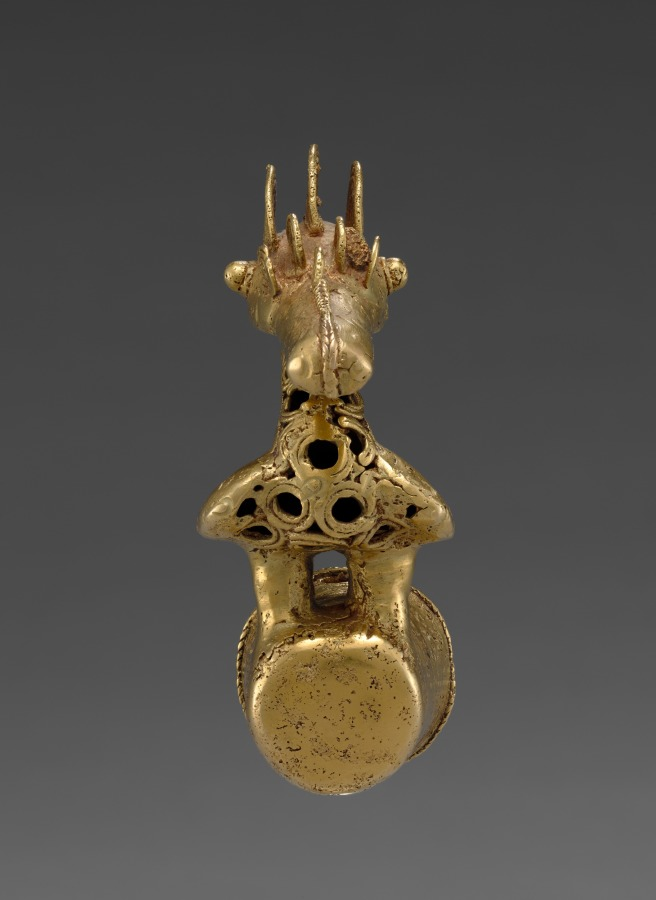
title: Finial with Long-Beaked Bird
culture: Isthmian Region (Colombia), Sinú (Zenú), 5th century-11th century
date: 400–1000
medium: gold, cast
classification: Metalwork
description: Unique to Colombia's Sinú region are gold finials with sculptural images at right angles to thimble-like caps; the caps fit over the end of a staff, an emblem of rank that may have been held horizontally. This impressive finial features a dignified, long-beaked bird whose body contains a pellet that rattles when the finial moves. Sinú animal imagery is understudied but may relate to beliefs about the cosmos. For instance, contemporary natives attribute importance to birds because they have the capacity to move among different environments (air, land, water); they may have been regarded as mediators among levels of the cosmos.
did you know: Birds, particularly water birds, may have been thought to travel between the different layers of the universe.